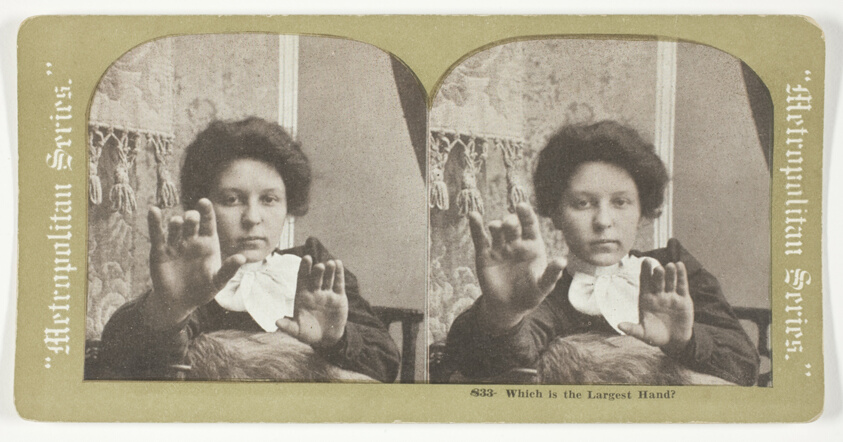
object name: Photograph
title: Which is the Largest Hand?, No. 833 from the series "Metropolitan Series"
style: 19th century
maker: Artist unknown; American, late 19th century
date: 1875/99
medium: Albumen print, stereo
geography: United States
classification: photography; photograph